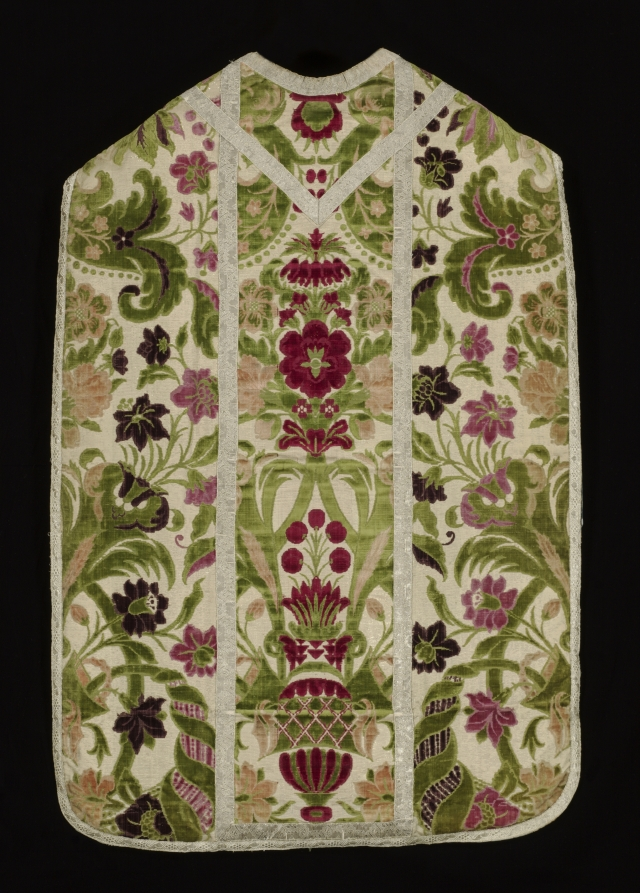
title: Chasuble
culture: Italy, Genoa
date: c 1600–1700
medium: Silk and gilt metal threads, woven; cut and uncut velvet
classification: Velvet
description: This sumptuous polychrome velvet displays a central vase with abundant flora and exotic leaves flanking curving blossoming fronds on a gilt-metal thread ground. The pattern was created with five colors of cut and uncut (loops) velvet pile. Only the pile warps for the lush green velvet occur across the entire cloth, while each additional color appears in vertical stripes—crimson, peach, rose, and purple. These widely acclaimed velvets from Genoa were the most colorful woven in Europe. Both the long stole and the shorter maniple are insignia of the office of deacons, priests, and the higher clergy. The stole was worn under a chasuble according to the office and the maniple was hung on the left forearm. The burse is a stiff receptacle in which the folded corporal, a white linen cloth on which the sacred bread and chalice are placed during the Mass, is carried to and from the altar. The upper fabric matches the chasuble, the bottom is a plain silk, and the interior has an obligatory linen lining.